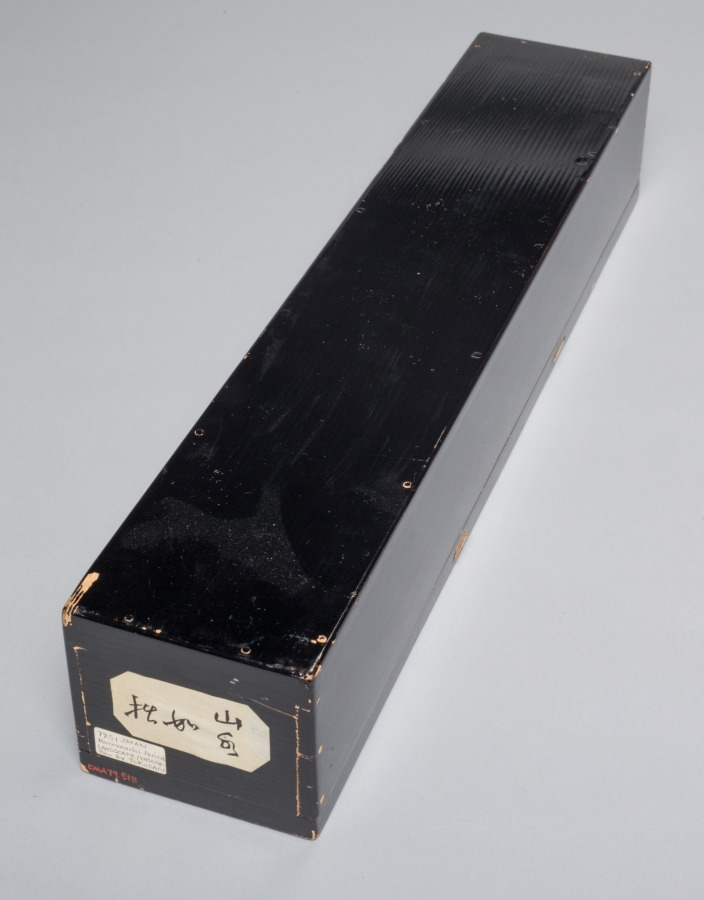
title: Landscape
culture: Japan, possibly Edo period (1615-1868)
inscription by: copy after Ishō Tokugan (Japanese, c. 1359–1437)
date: early 1600s to mid-1800s?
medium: hanging scroll; ink and slight color on paper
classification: Painting